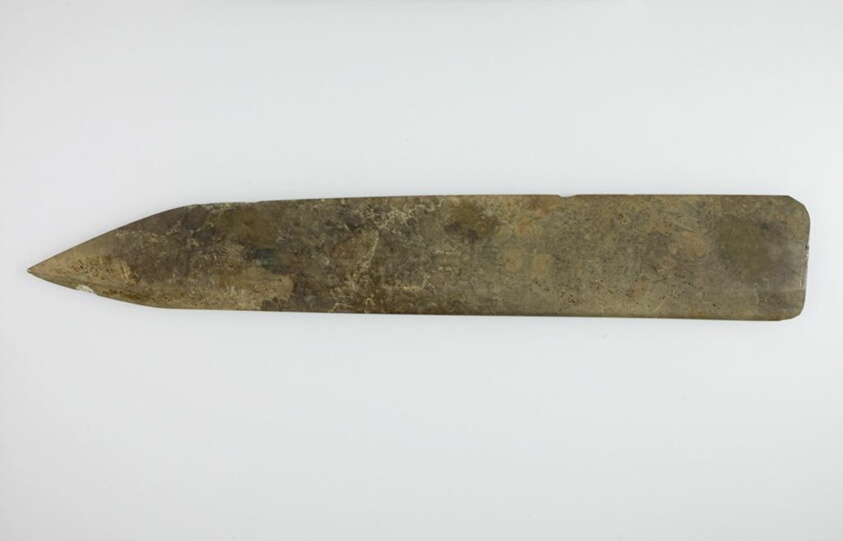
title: Dagger axe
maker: China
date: Shang dynasty (c.1600–1050 BC)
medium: Jade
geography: China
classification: jade; asian art